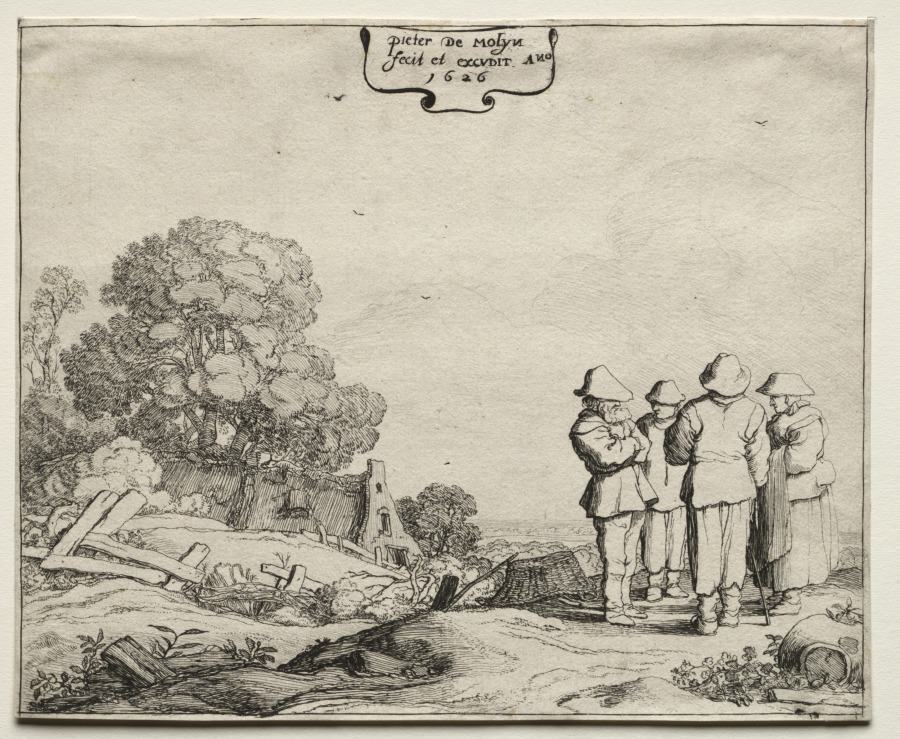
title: Landscapes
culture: Netherlands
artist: Pieter Molyn (Dutch, 1595–1661)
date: 1626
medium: etching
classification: Print